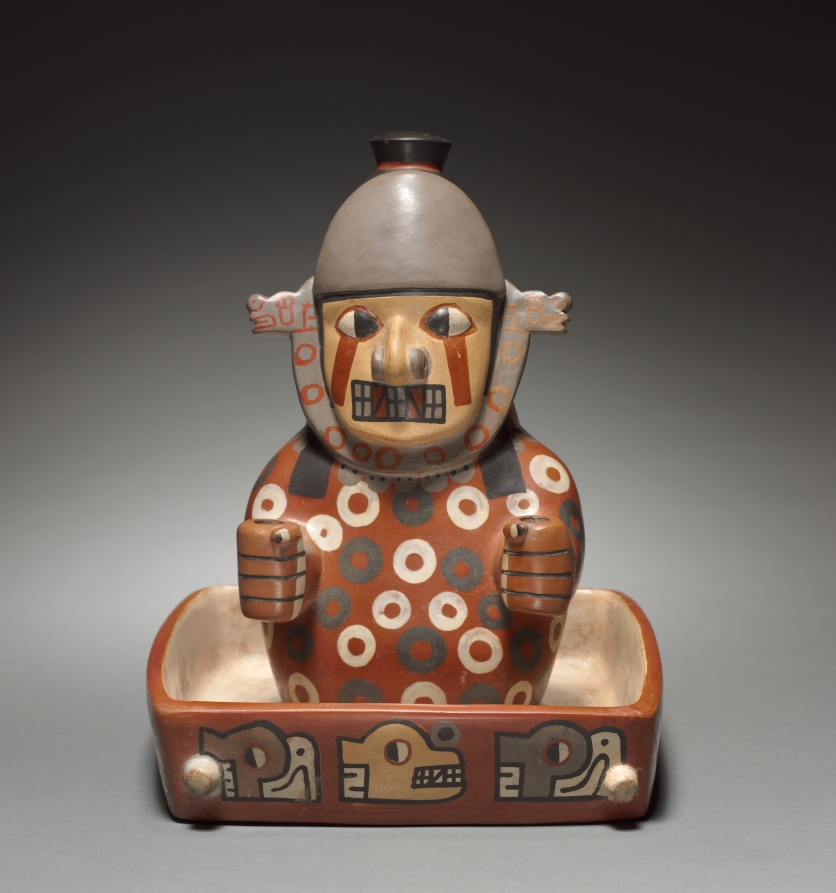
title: Figure in a Litter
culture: Wari (Pachacamac) style, Middle Horizon, Epoch 2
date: 500–900 (Thermoluminescence date, 590–1090)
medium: earthenware with colored slips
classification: Ceramic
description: Whether a deity, ancestral mummy, or masked human, this figure signals power. The divided eyes and fangs are traits of supernatural beings. The hands are cupped around holes that once perhaps held staffs, symbols of human and divine authority. And the litter was a mode of travel reserved for those of high station; the knobs refer to poles that rested on the shoulders of human bearers.